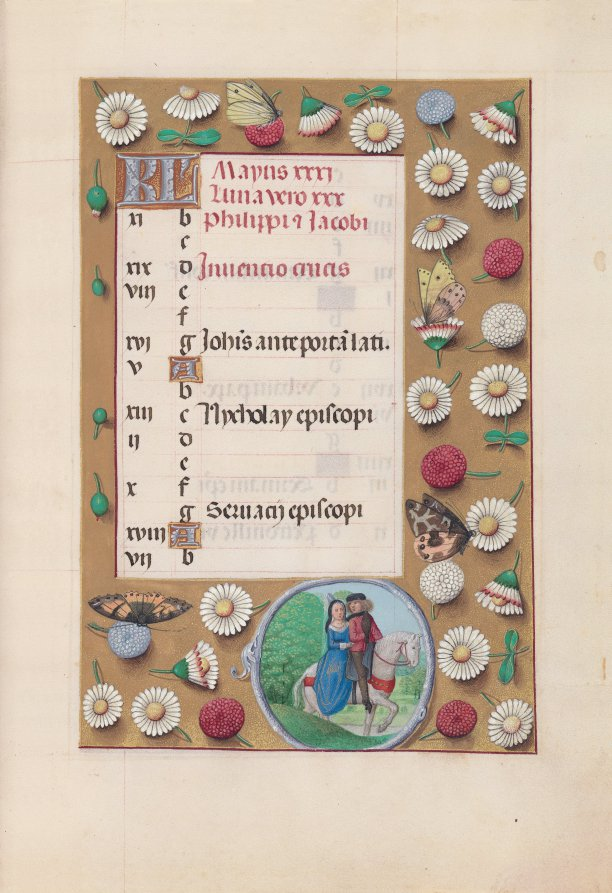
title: Hours of Queen Isabella the Catholic, Queen of Spain: Fol. 6r, May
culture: Flanders, Ghent and Bruges, late 15th century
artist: Master of the First Prayerbook of Maximillian (Flemish, c. 1444–1519)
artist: and Associates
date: c. 1500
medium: ink, tempera, and gold on vellum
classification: Bound Volume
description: This manuscript was illuminated by a circle of at least five highly organized manuscript painters active in the Flemish cities of Ghent and Bruges. The principal illuminator was Alexander Bening, who painted the majority of the book's miniatures. Manuscripts produced by this circle of artists are renowned for the decoration of their borders, which typically feature a rich variety of realistically painted flowers, birds, and butterflies. This prayer book, called a book of hours, was intended not for a cleric but for the private devotions of a lay person—in this case, Isabella the Catholic, Queen of Spain (1451–1504); her coat of arms embellishes the book's frontispiece. It is unlikely that the book was commissioned by the Queen herself; rather, she probably received it as a diplomatic gift from someone courting her patronage, perhaps Cardinal Francisco Jimenez de Cisneros. A Franciscan friar, Jimenez was dependent upon Isabella for his advancement, first to the post of Queen's confessor in 1492, and then to Archbishop of Toledo in 1495.